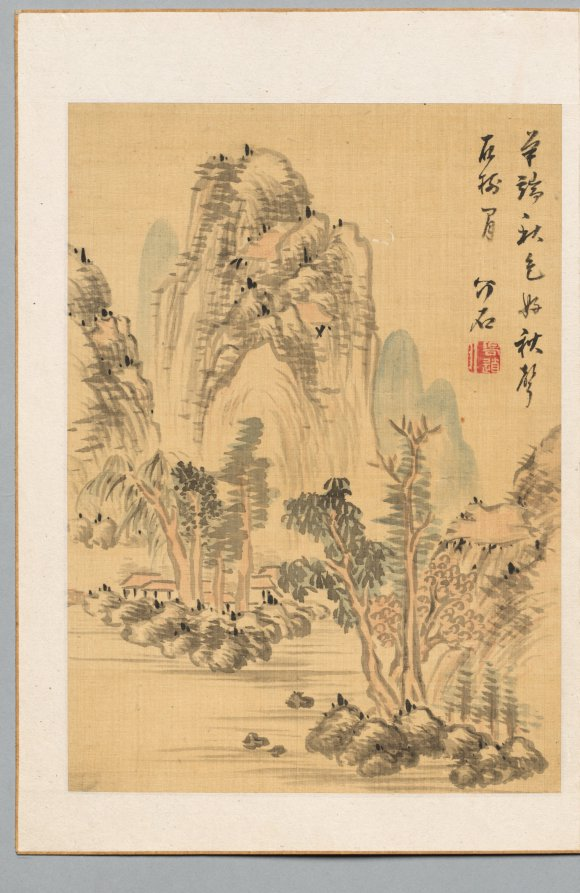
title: Colors and Sound of Autumn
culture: Japan, Edo period (1615–1868)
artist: Noro Kaiseki (Japanese, 1747–1828)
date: late 1700s-early 1800s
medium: leaf from a pair of folding albums; ink and light color on paper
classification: Portfolio